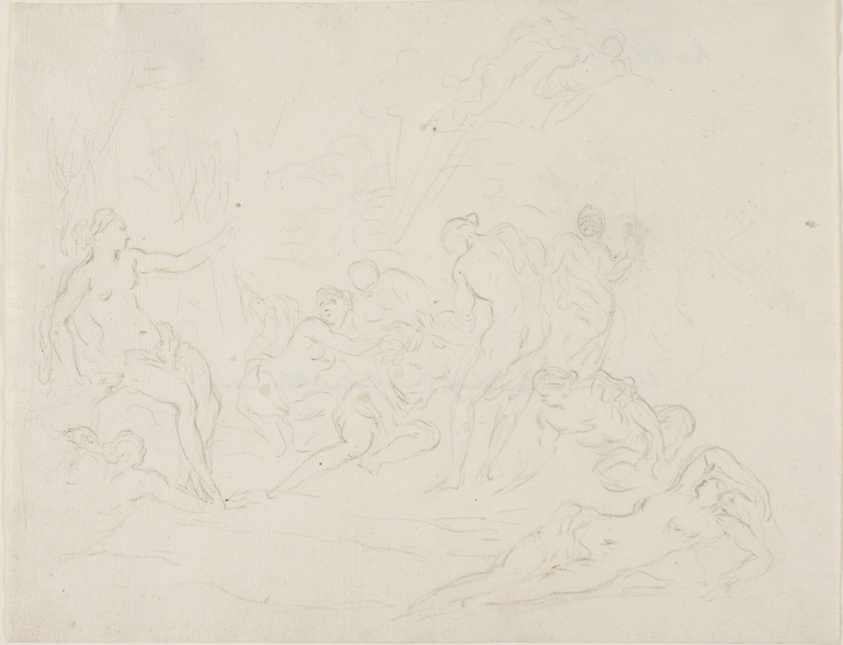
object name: Drawing and Watercolor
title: Diana and Callisto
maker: Possibly School of Nicolas Poussin; French, 1594-1665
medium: Black chalk on ivory laid paper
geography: France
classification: chalk; drawings (visual works); prints and drawing